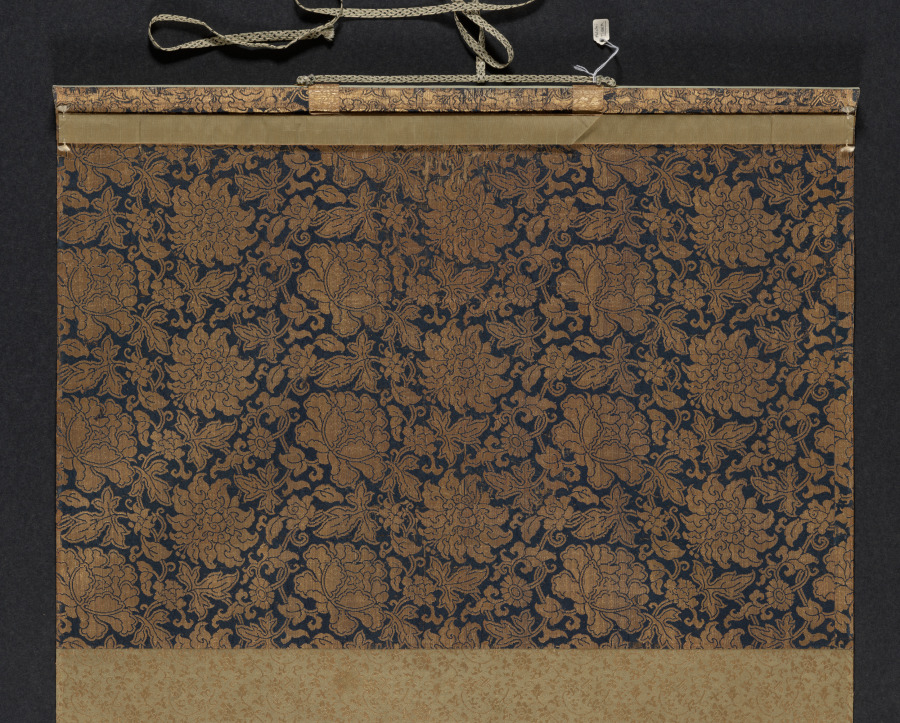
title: Tiger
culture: China, Southern Song dynasty (1127-1279)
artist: Fachang Muqi (Chinese, 1220–1280)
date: c. 1250–79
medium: Hanging scroll; ink and slight color on silk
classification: Painting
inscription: 道有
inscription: 雜華室印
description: The dragon and tiger are tied to the philosophical concept of yin and yang, which describes opposite but complementary forces. The dragon occupies a tiered background of waves and mist. Its luminous head emerges from the darker passages, and its narrow twisting body is serpent-like. By contrast, the close-up view of the tiger emphasizes its bulk. The tiger bends its head to lick its paw while its tail curls in the foreground. In their original Chan Buddhist context, this pair of scrolls likely flanked a central image, like the Bodhisattva Guanyin. The silk has darkened over the centuries, and the slight reddish shading in the tiger’s tongue and nose has faded.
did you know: Fachang Muqi's ink paintings, like this pair, were highly appreciated and collected in Japan.